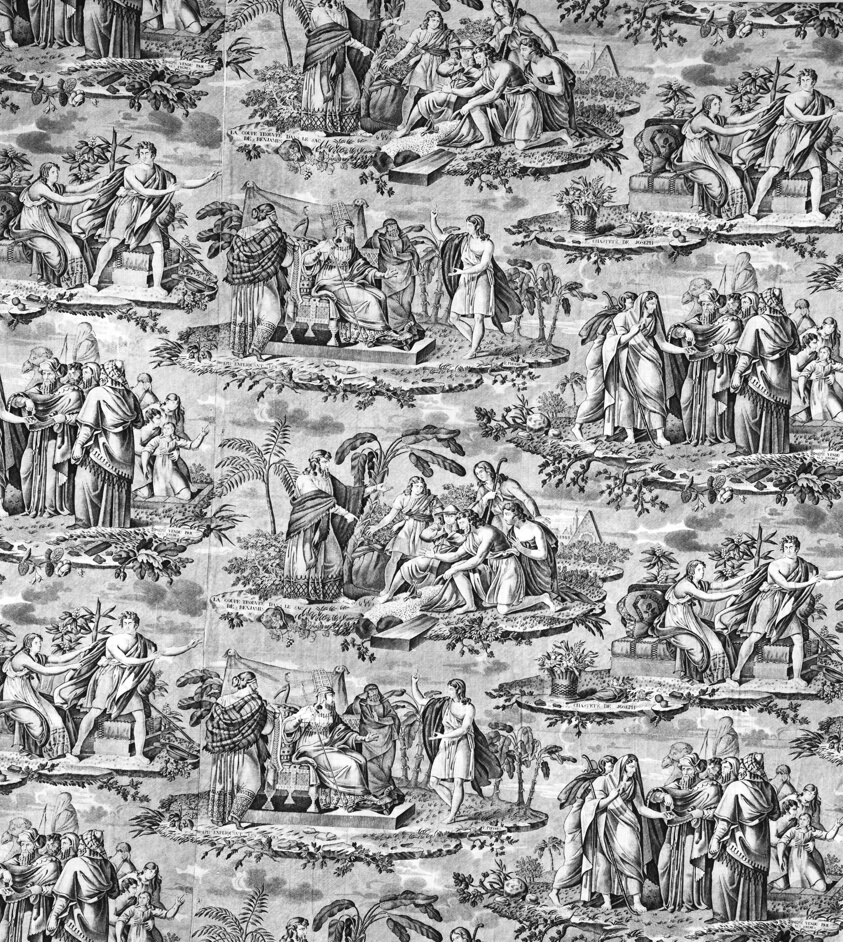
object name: Textile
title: The Story of Joseph (Furnishing Fabric)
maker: Designed by François Pieters (French, active c. 1820) after Charles Abraham Chasselat (French, 1782-1843) engraved Tony Johannot (Germany, active 1813-1852); France, Rouen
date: c. 1820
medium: Cotton, plain weave; engraved roller printed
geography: Rouen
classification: textile; weaving - printed; furnishing textile